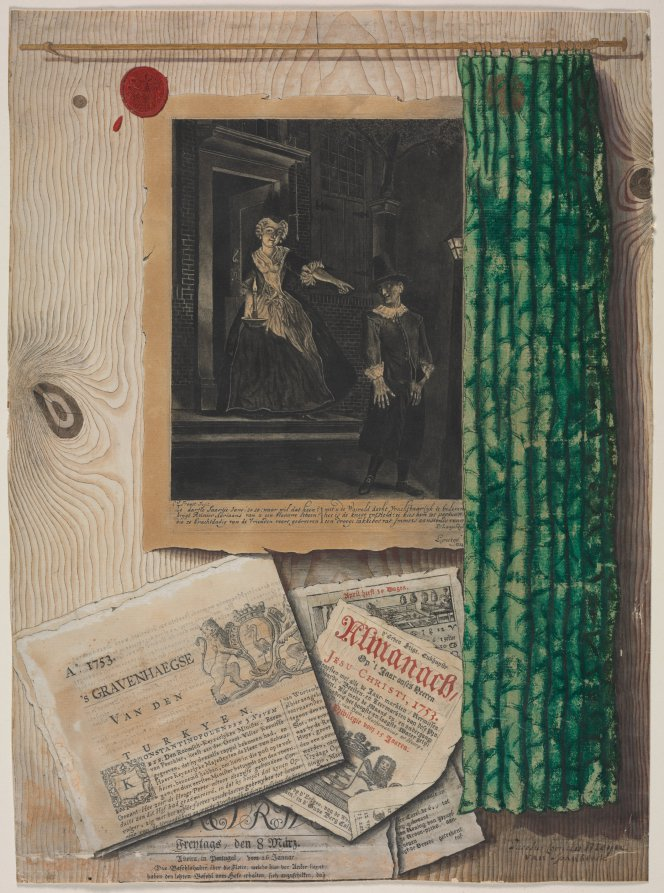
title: Trompe l'Oeil Still Life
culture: Netherlands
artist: Jacobus Cornelis Meyer (Dutch, active 1700s)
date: c. 1754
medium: pen and ink, point of brush and black ink wash, watercolor and gouache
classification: Drawing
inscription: signed, lower right, in gray watercolor: Jacobus Cornelis Meyer / van Spanbrock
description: Understood in the 1700s as a delightful, intellectual game, trompe l’oeil paintings and drawings such as this one were devised to “trick the eye” as the French term suggests. Toeing the line between realism and deception, the details of these compositions expose them as elaborate illusions. Here, Jacobus Cornelis Meyer’s image invites the viewer to uncover the trick. While the print depicted at center alludes to a well-known Dutch comedy revolving around hidden identity, the open curtain and fictional tears and creases in the papers encourage the viewer to physically reach out and break the illusion.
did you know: In addition to tricking the eye, trompe l’oeil images like this one were meant to demonstrate an artist’s skill.